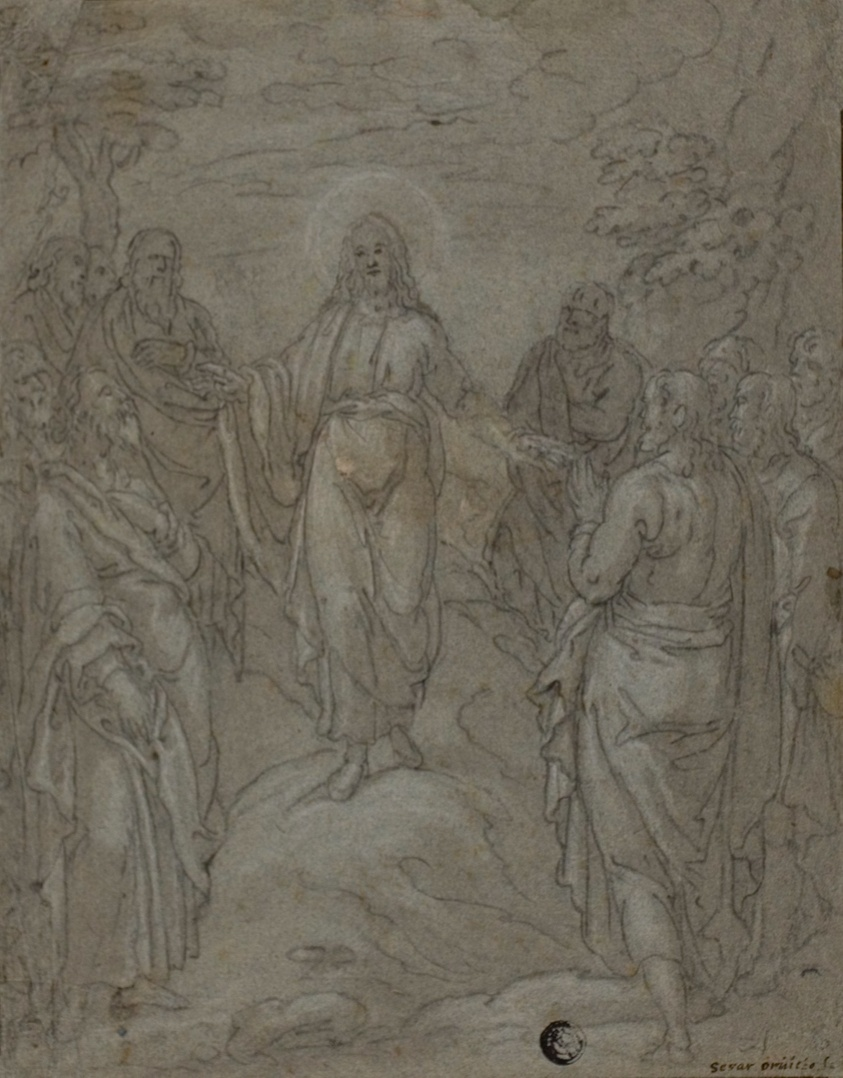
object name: Drawing and Watercolor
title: Christ and the Apostles (recto); Sketch of a Nativity Scene (verso)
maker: Unknown Artist; Italian, Late 16th century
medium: Black chalk heightened with white chalk (recto), and black chalk (verso), on blue laid paper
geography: Italy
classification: chalk; drawings (visual works); prints and drawing